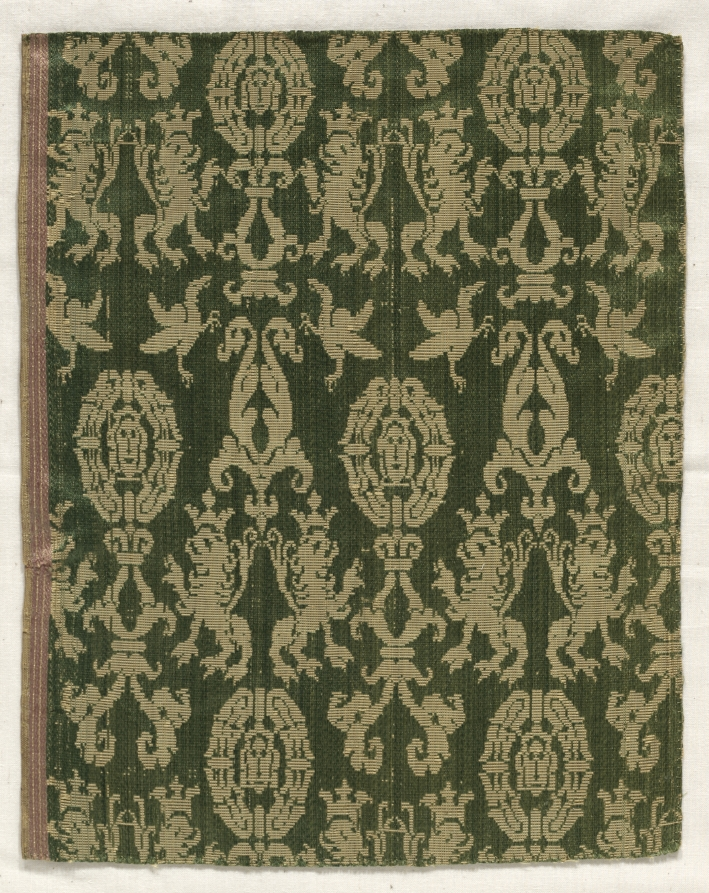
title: Satin Fragment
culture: Spain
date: 1400s–1500s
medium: silk: lampas weave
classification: Textile